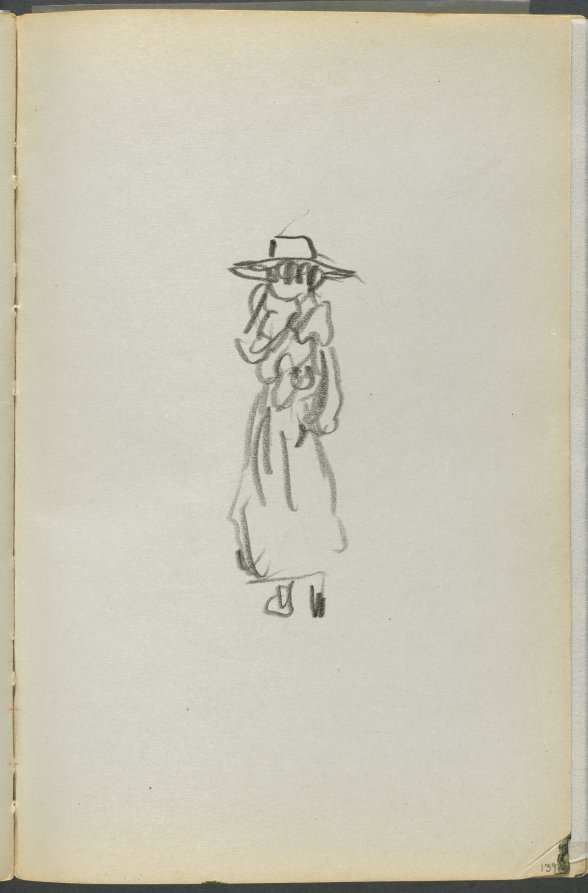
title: Sketchbook, The Dells, N° 127, page 139: Standing Figure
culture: America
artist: Maurice Prendergast (American, born Newfoundland [now Canada], 1858–1924)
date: c. 1919–1921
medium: graphite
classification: Bound Volume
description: This sketchbook contains 59 pages of graphite drawings and 16 watercolors made at various locations on Cape Ann, Massachusetts.